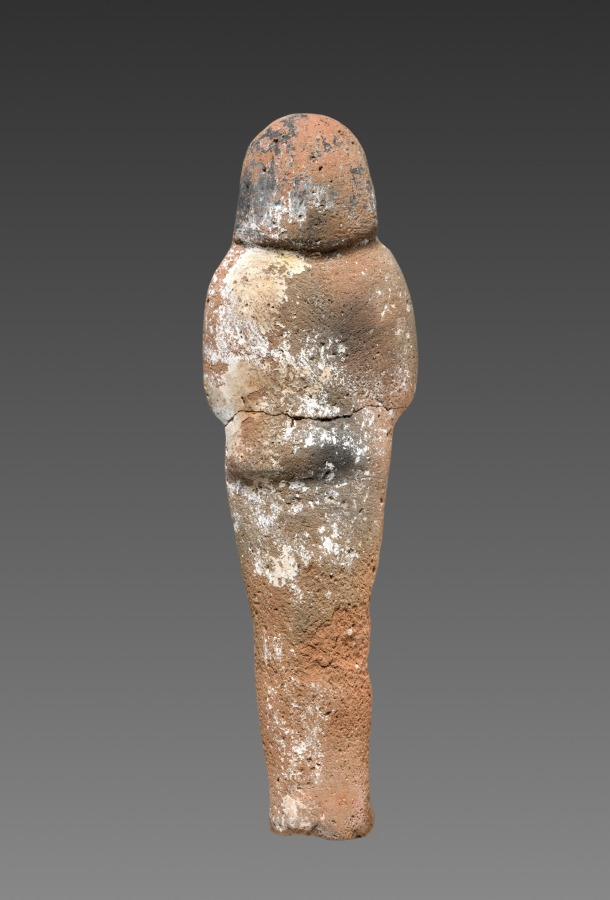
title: Shawabty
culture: Egypt, New Kingdom (1540–1069 BCE), Dynasties 19–20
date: 1295–1069 BCE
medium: terracotta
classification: Funerary Equipment